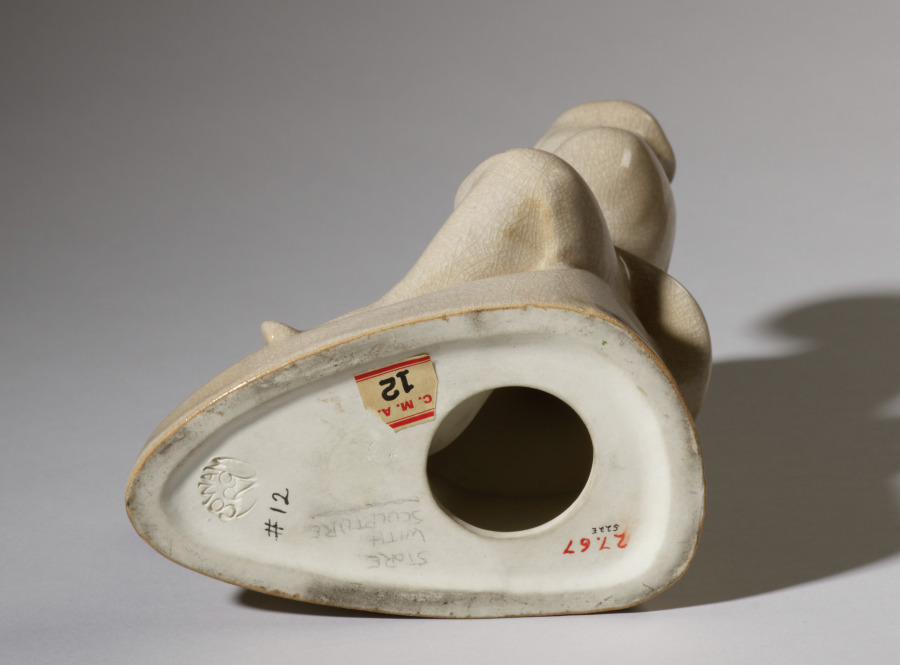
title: Tambourine Player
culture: America, Ohio, Cleveland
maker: Cowan Pottery Studio (America, Rocky River, Ohio, 1920–1931)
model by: Alexander Blazys (American, born Russian Empire [now Lithuania], 1894–1963)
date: 1927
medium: mold-made ceramic, glazed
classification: Ceramic